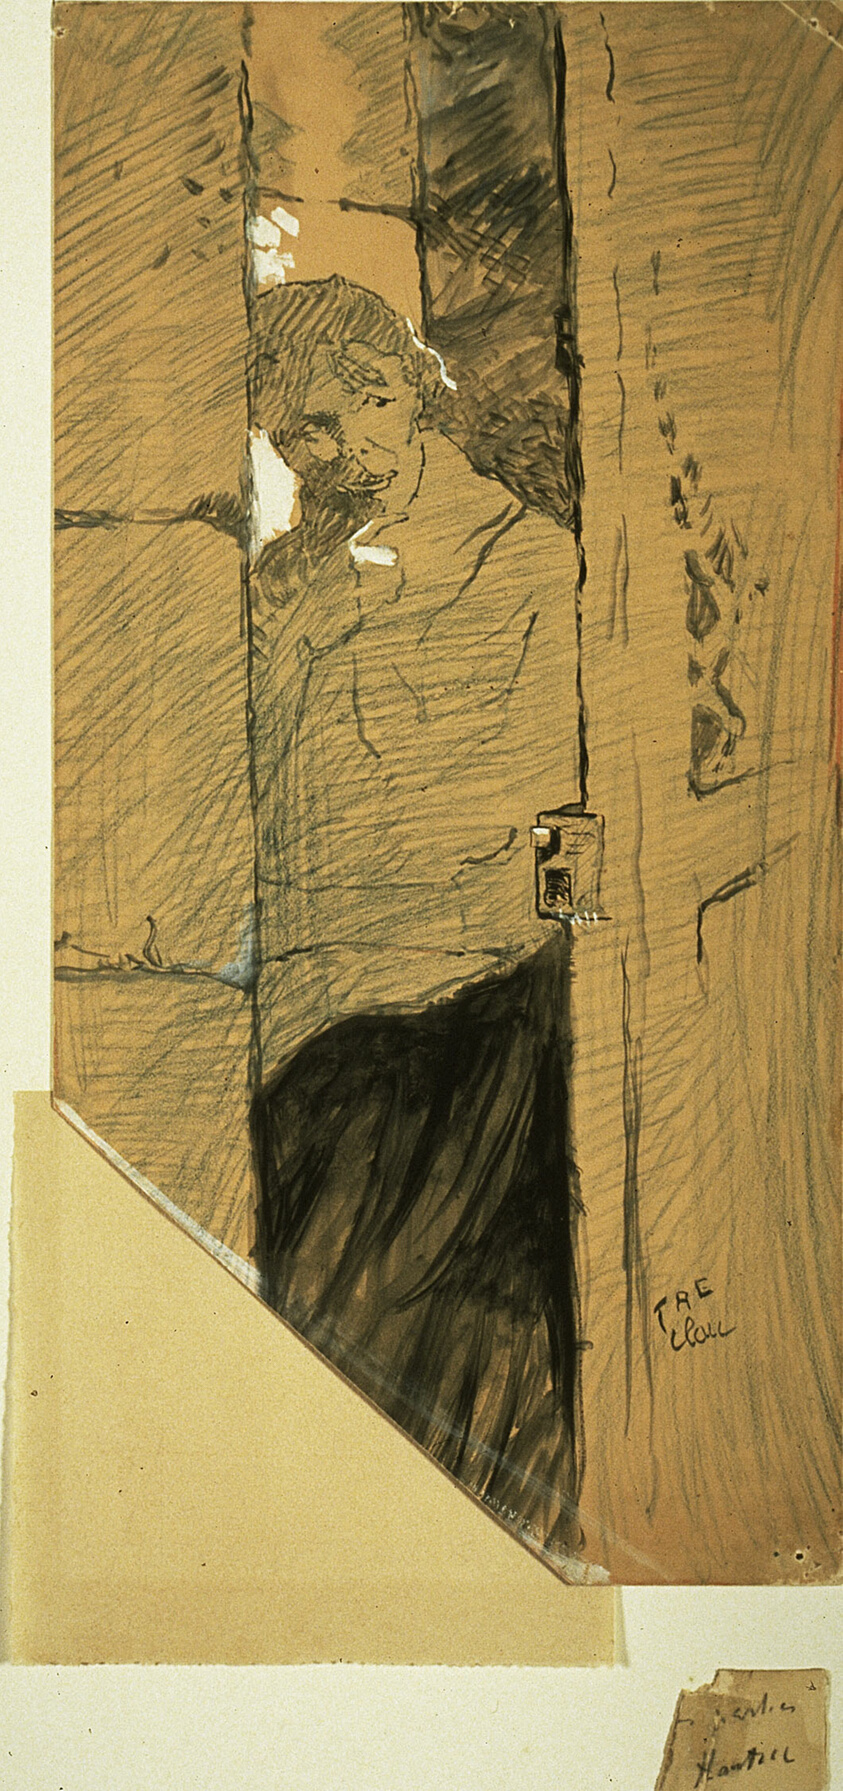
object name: Drawing and Watercolor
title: At the Door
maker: Henri de Toulouse-Lautrec (French, 1864-1901)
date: 1885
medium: Blue crayon and brush and black and gray wash, with touches of orange crayon, heightened with touches of white oil paint, on tan wove card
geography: France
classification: crayon; drawings (visual works); prints and drawing